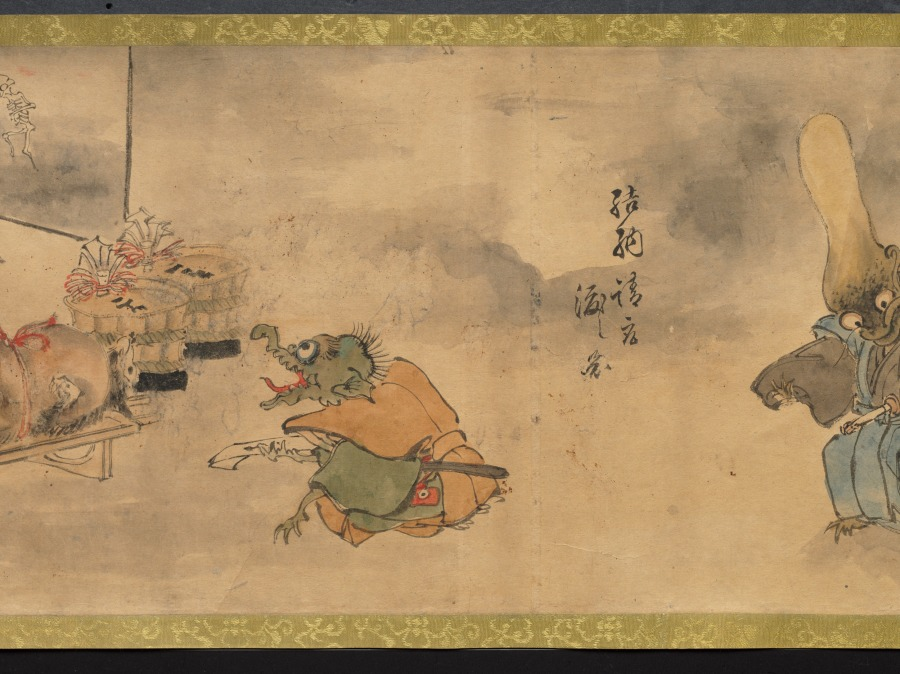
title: An Illustrated Marriage of Apparitions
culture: Japan, Edo period (1615–1868)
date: mid-1800s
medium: handscroll; ink and color on paper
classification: Painting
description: The matchmaking, engagement, wedding, and birth of the first child of two apparitions, or bakemono, literally "things that change," are illustrated in this whimsical, humorous handscroll. Japanese folklore abounds with such strange creatures, most famously represented in handscrolls featuring a procession of 100 supernatural monsters. Aside from a textual preface and cartouches indicating the content of the scenes, the tale is told visually. The artist and whereabouts of the original handscroll are unknown, but a number of other 19th-century copies by amateur painters exist in Japanese collections, attesting to its broad appeal.